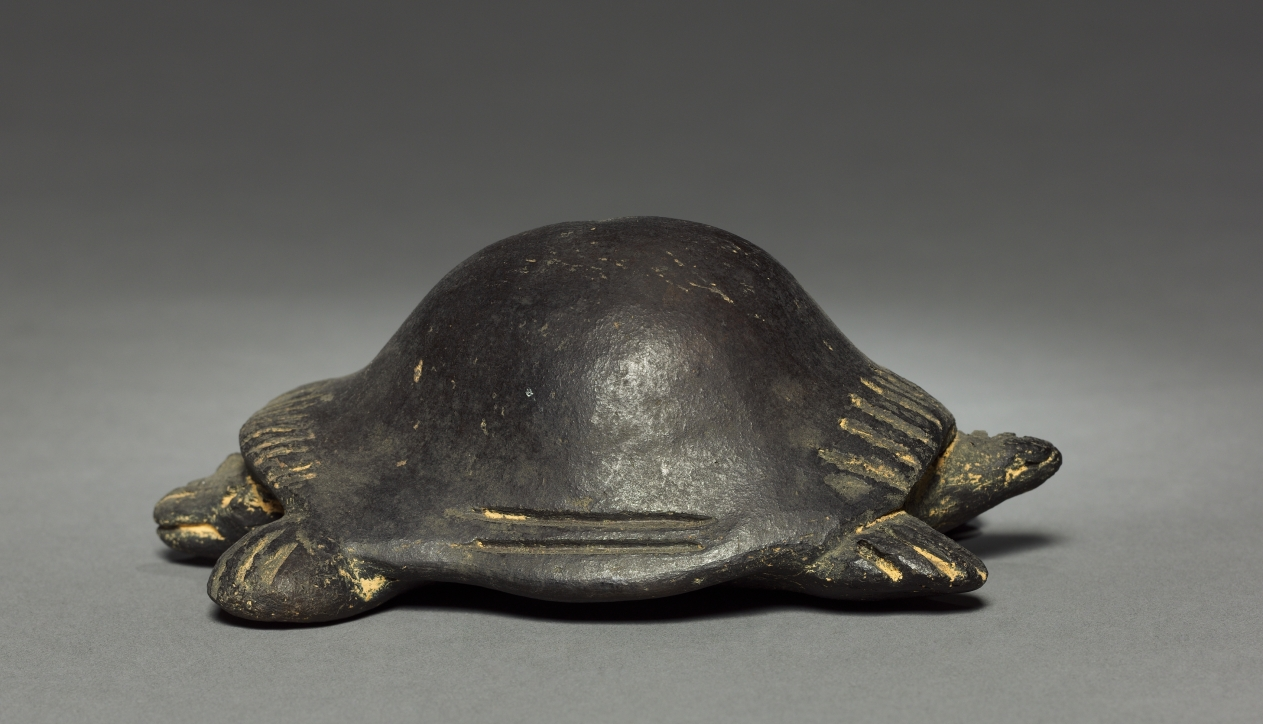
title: Turtle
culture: Colombia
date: before 1921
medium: pottery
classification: Ceramic